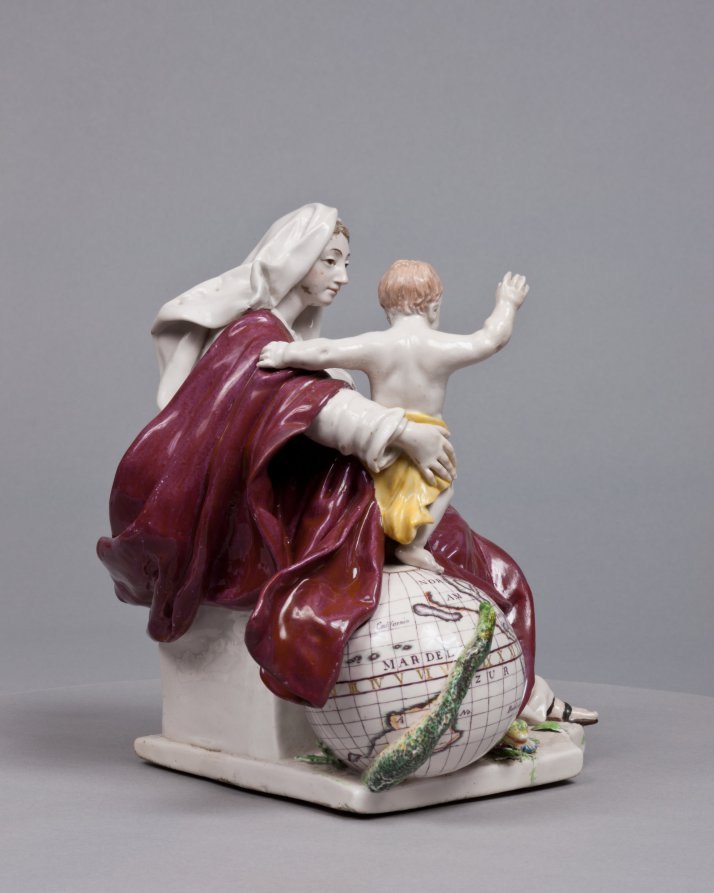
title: Madonna and Child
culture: England, Chelsea, 18th century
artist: Chelsea Porcelain Factory (Britain, London, 1745–84)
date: c. 1755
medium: porcelain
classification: Ceramic